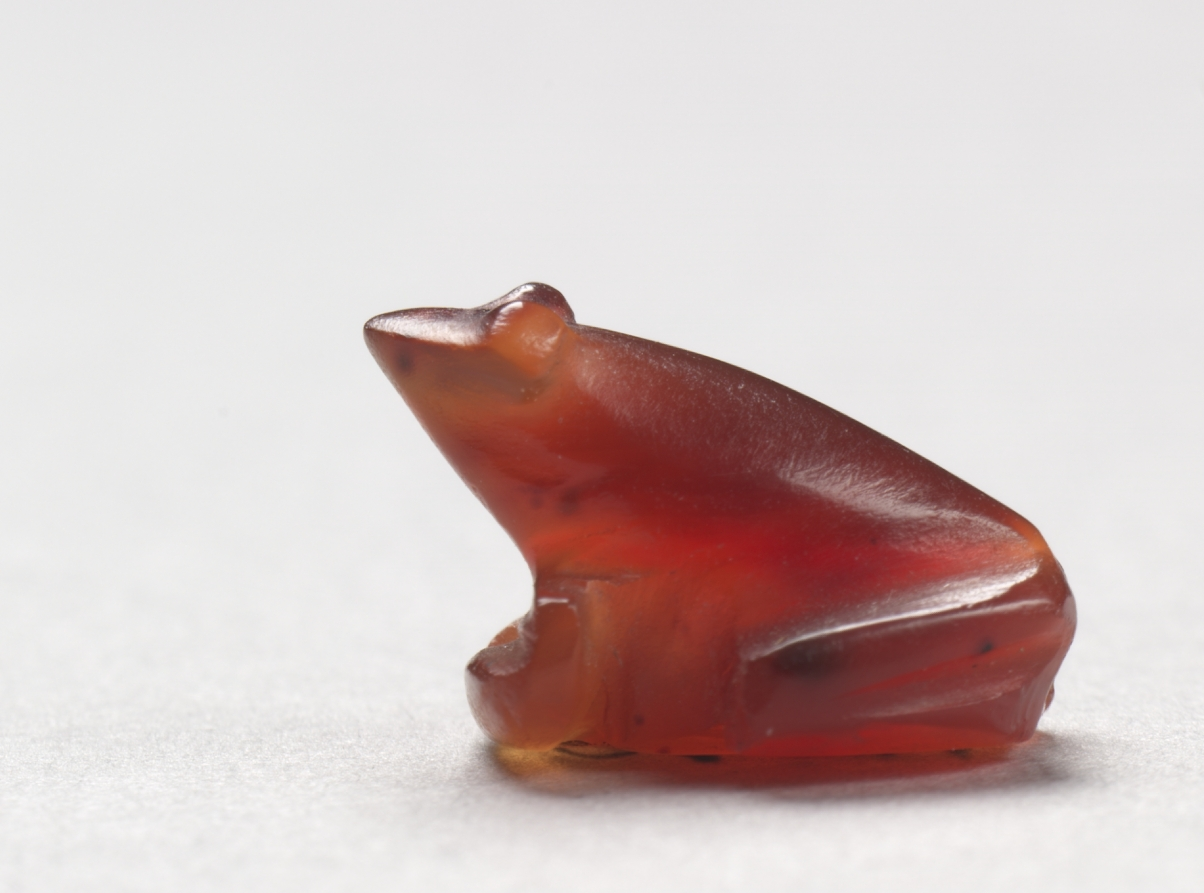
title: Frog Amulet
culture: Egypt, New Kingdom (1540–1069 BCE), Dynasty 18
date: c. 1540–1296 BCE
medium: carnelian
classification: Amulets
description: The frog, because of its numerous offspring, was a symbol of fertility. In fact, the hieroglyphic sign for 100,000 was a tadpole. Frog amulets were very popular both in semiprecious stone and in faience, and were worn by women hoping for an easy delivery. Both sexes wore the frog in expectation of a successful rebirth in the afterlife.